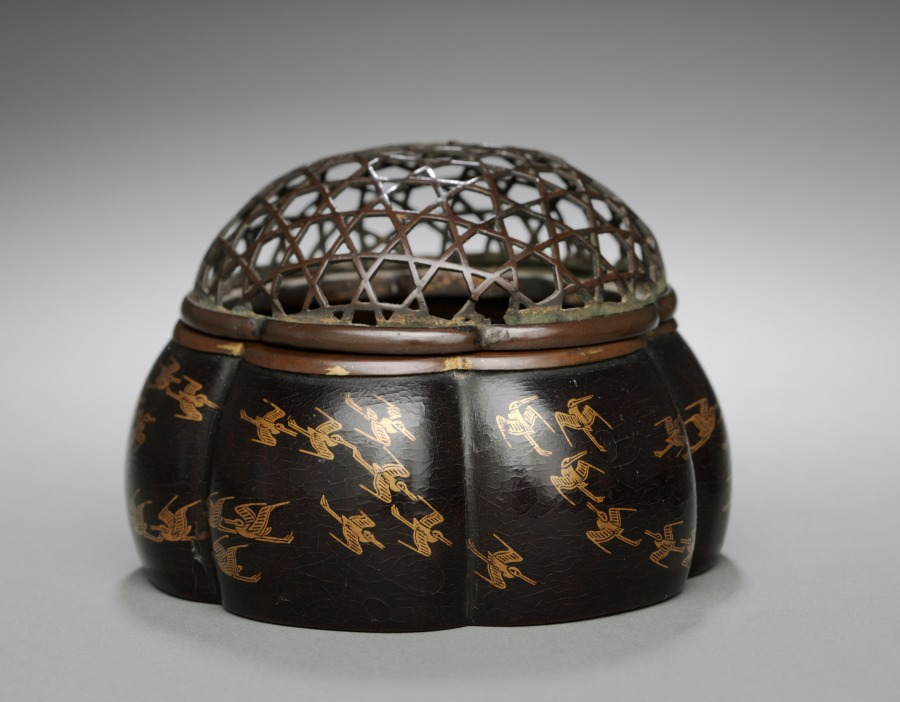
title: Incense Burner with Lid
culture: Japan, Nanbokuchō period (1336–92)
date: late 1300s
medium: black lacquer on wood with decoration in maki-e; metal rims; bronze lid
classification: Lacquer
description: This container's repeated, undulating, rounded sides evoke waves over which the articulated plovers sweep. The bronze cover (probably a later addition) mimics the design of a fishing weir. Overall, the container brings to mind the seashore. The earthy quality of the lacquered surface demonstrates the interaction between a man-made pattern (the plovers) and the somewhat unexpected surface of a natural material such as wood.